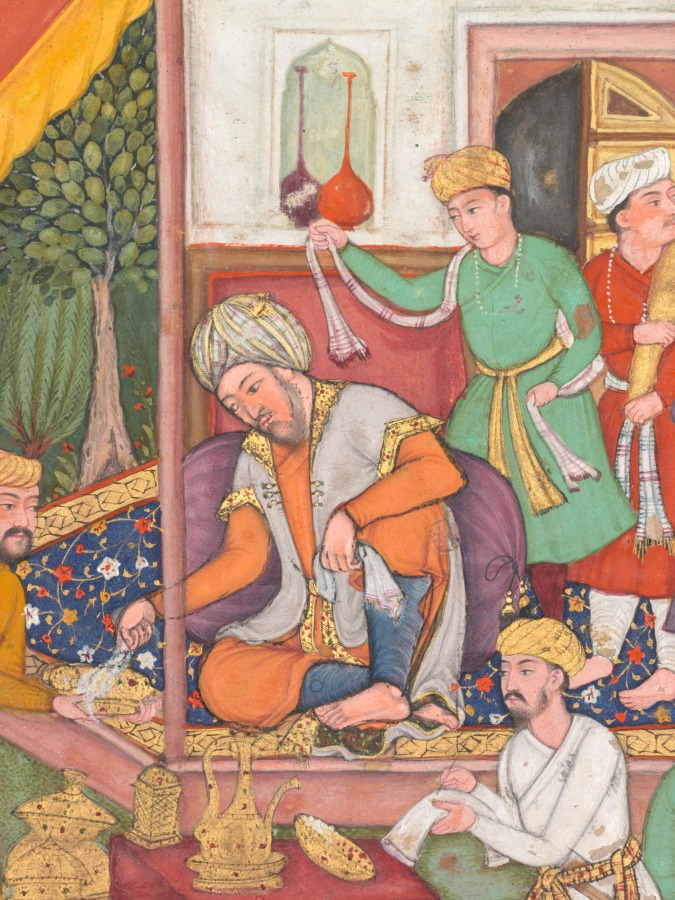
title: Timur distributes gifts from his grandson, the Prince of Multan, from a Zafar-nama (Book of Victories)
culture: Mughal India, court of Akbar (reigned 1556–1605)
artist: Shravana (Indian, active 1550s–c.1600)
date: 1598–1600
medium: Gum tempera, ink, and gold on paper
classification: Painting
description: The Turkic conqueror Timur (1336–1405) is the Mughal emperor Akbar’s most celebrated paternal ancestor. He sits on a terrace, shaded by a crimson awning. The blue carpet with gold border marking his high status is covered with a floral vine pattern that became fashionable in the 1500s. This scene takes place in a territory governed by Timur’s grandson, who sent him gifts of horses, camels, and a variety of luxury items. Timur is in the process of regifting them to members of his entourage in accordance with their merits.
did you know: Pre-modern giftwrap: Round textiles cover presentation platters.